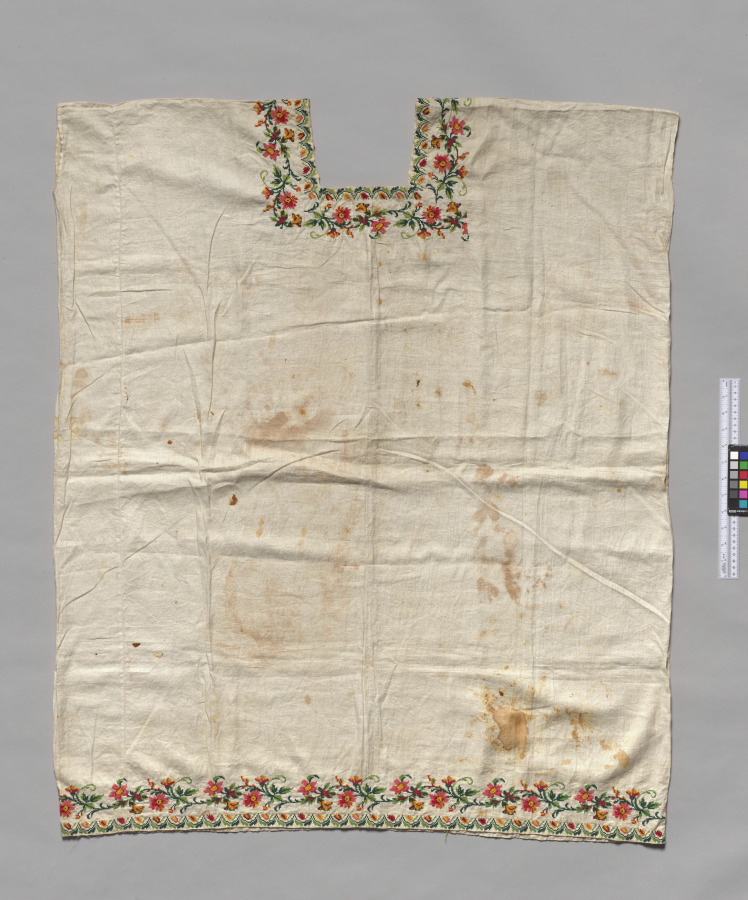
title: Embroidered Woman's Garment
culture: Mexico, Yucatan, 19th century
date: 1800s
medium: plain weave cotton; embroidered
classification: Embroidery